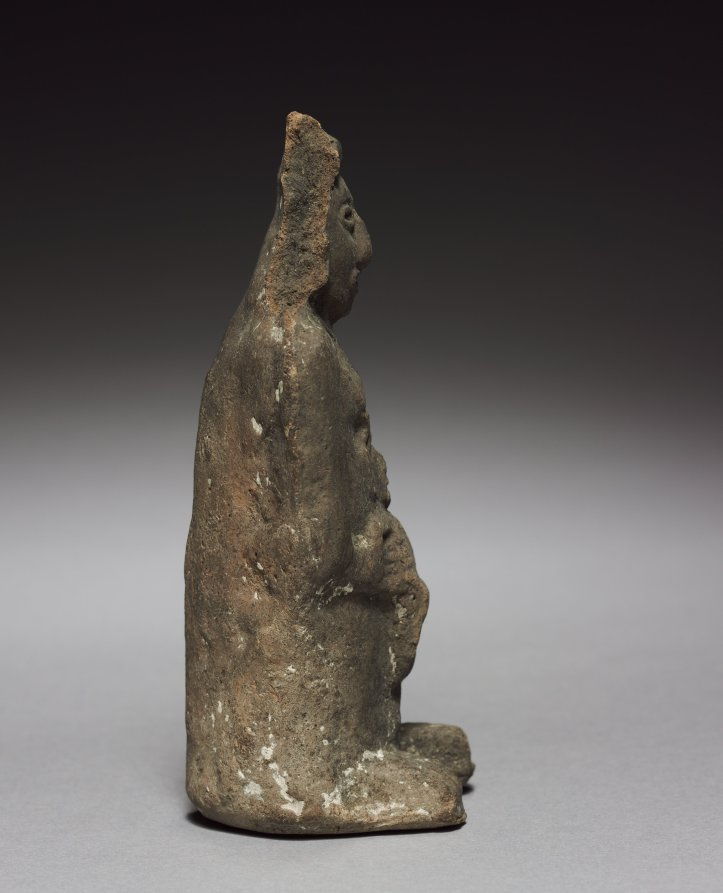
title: Figurine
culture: Mexico, Aztec, 14th century-16th century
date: 1325–1521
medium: terracotta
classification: Ceramic